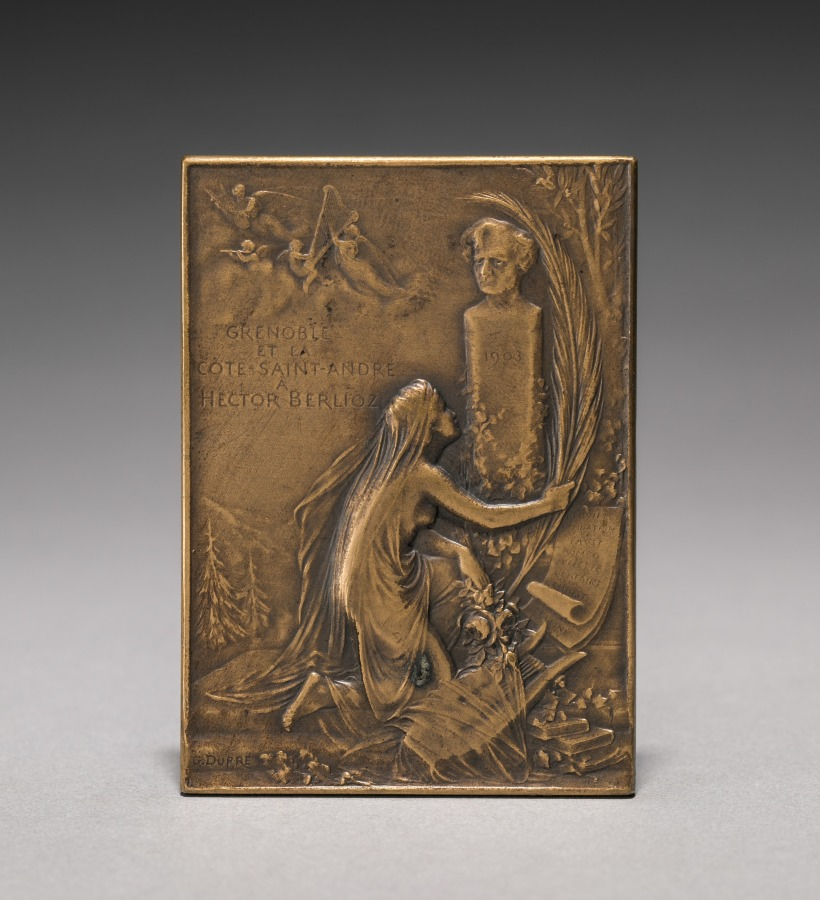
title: Medallion (reverse)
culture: France, early 20th century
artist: Jules Dupré (French, 1811–1889)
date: 1903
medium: bronze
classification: Metalwork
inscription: "Hector Berlioz 1803 - 1869; Les Troyens"; signed: "G. Dupré."